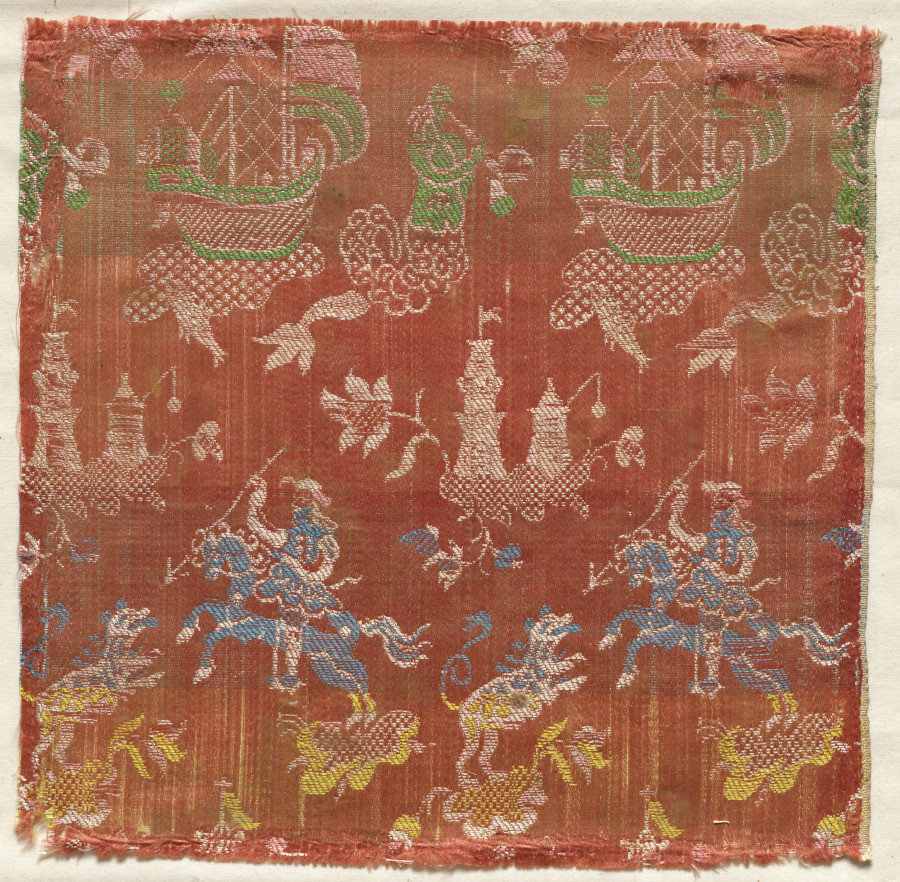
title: Brocaded Satin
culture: Spain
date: 1700s(?)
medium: satin brocaded with silk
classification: Textile